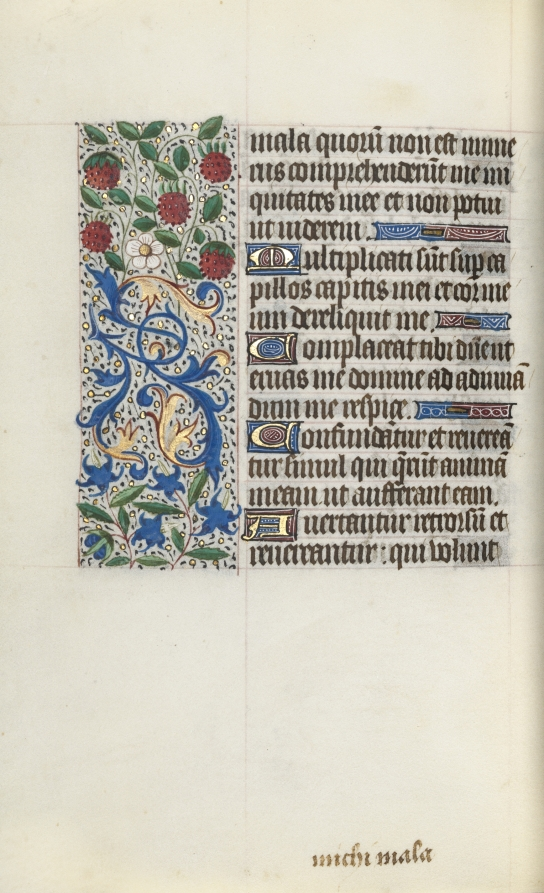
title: Book of Hours (Use of Rouen): fol. 126v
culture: France, Rouen, 15th century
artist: Master of the Geneva Latini (French, active Rouen, 1460–80)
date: c. 1470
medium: ink, tempera, and gold on vellum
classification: Bound Volume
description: In the late 1400s and early 1500s Rouen was an established and important center of book production. The city’s cathedral had a wealthy chapter that spent large sums of money to commission books and to maintain its extensive library. The stationers and booksellers would have likely been concentrated in or near the cathedral precinct. This artist, named after a manuscript now in Geneva, was Rouen’s principal illuminator during the second half of the 1400s.